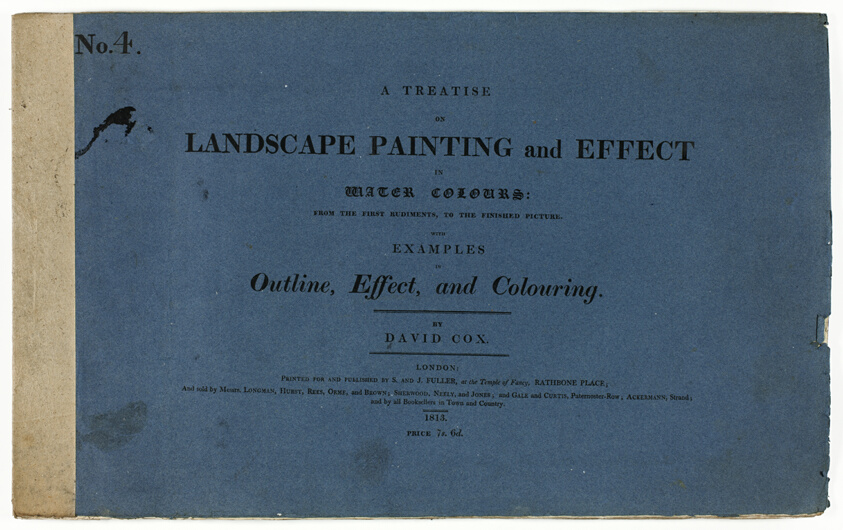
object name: Book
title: A Treatise on Landscape Painting and Effect in Water Colours: From the First Rudiments, to the Finished Picture No. 4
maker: David Cox, the elder (English, 1783-1859); published by S. and J. Fuller (English, 19th century)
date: 1813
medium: Book with six etchings and letterpress in black on cream wove paper, in box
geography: England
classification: book; paper; prints and drawing